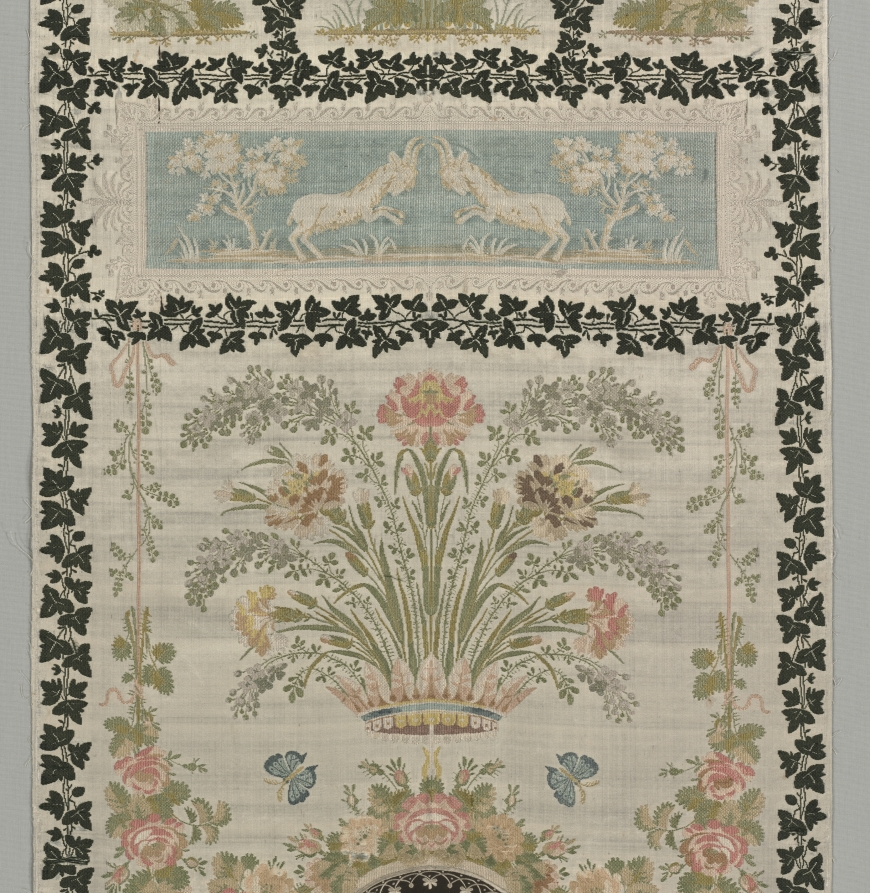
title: Wall Covering with Classical Figure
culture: France, late 18th-early 19th Century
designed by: Philippe de Lasalle (French, 1723–1805)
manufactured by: Camille Pernon & Cie (French)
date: late 1700s - early 1800s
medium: Silk: llampas (satin weave and plain weave variant), brocaded, appliquéd, embroidered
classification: Textile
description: France developed a thriving silk industry in Lyon with the goal of becoming the fashion center of Europe. Employment soared to some 20,000 workers by the time of the French Revolution in 1789. Designs changed annually, colors established new fashions, and spectacular silks were produced during the late 1700s. Philippe de Lasalle, trained as a painter by François Boucher, became the celebrated chief textile designer for Camille Pernon & Cie, purveyors to King Louis XVI (reigned 1785-90). Lasalle’s floral style with large and balanced designs, enhanced here with a fashionable classical figure, displays his preference for lighter forms without the opulent gold thread of earlier brocaded silks.